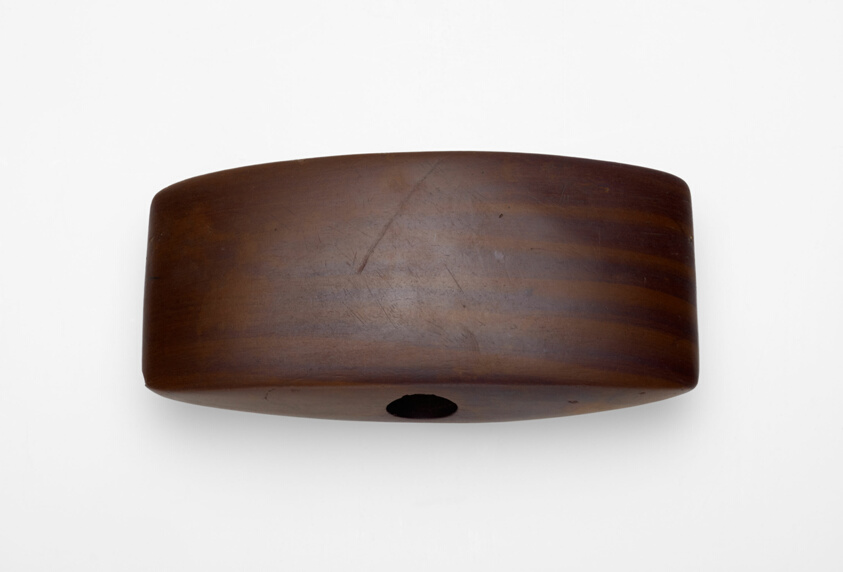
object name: Sculpture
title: Double-Edged Bannerstone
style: archaic america, midwestern, ancient, Arts of the Americas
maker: Archaic (Madison County, Tennessee, United States)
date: 5800–4000 BCE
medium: Banded claystone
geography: Tennessee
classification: weapon; stone; art of the americas; sculpture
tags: authority